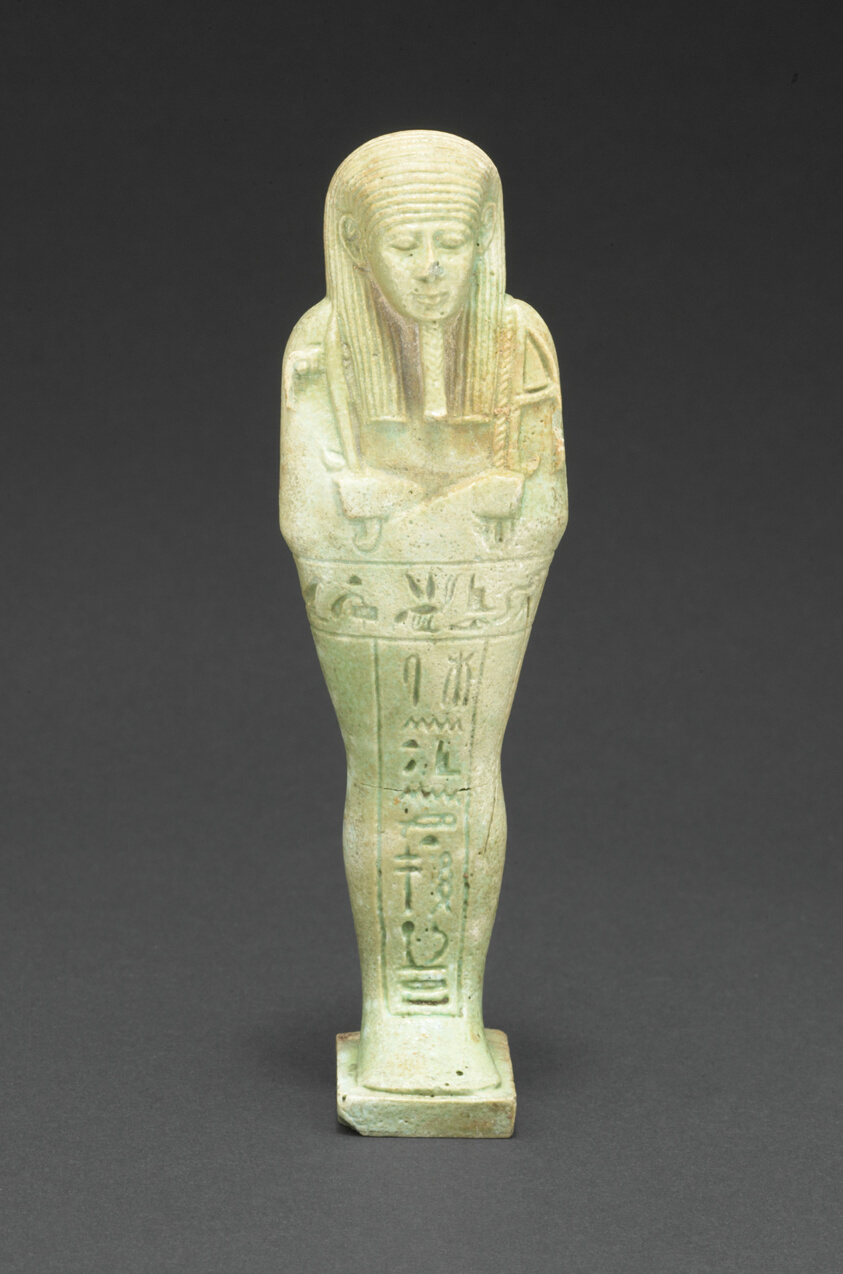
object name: Funerary Object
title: Shabti of Horu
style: late period (egyptian), egyptian, ancient, twenty-sixth dynasty, saite period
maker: Egyptian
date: Late Period, Dynasty 26 (664-525 BCE)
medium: Faience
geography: Egypt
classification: ushabti; figurine; funerary; ceramics; ancient art; faïence (composite material)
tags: Hieroglyphs